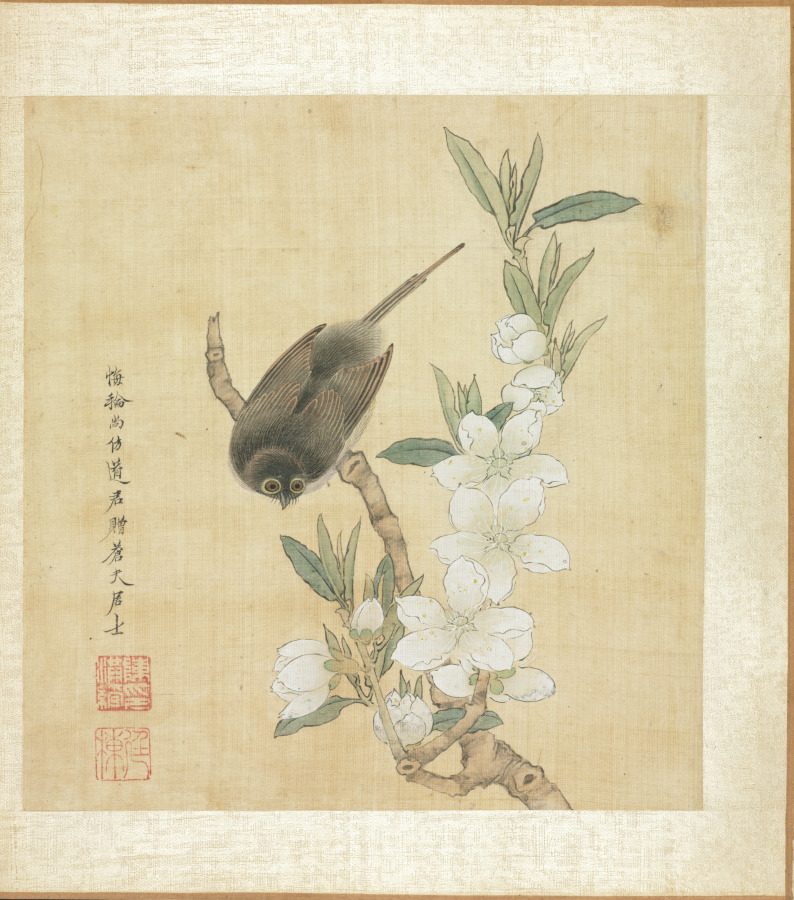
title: Paintings after Ancient Masters: A Bird and Peach-Blossom Branch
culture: China, Ming dynasty (1368–1644)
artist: Chen Hongshou (Chinese, 1598/99–1652)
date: 1598–1652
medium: album leaf, ink and color on silk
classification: Painting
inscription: Hui-lun-shang painted after Tao-chün [Emperor Hui-tsung] and presented it to Ts'ang-fu chü-chih. [Seal] Ch'en yin Hung-shou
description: The twenty paintings in this double-album by Chen Hongshou include landscapes, figures, and flowers. It also has one leaf featuring a woman, an often-used subject not found in the other albums from the latter part of his career. His late works are wonderful summations of Chen's peculiar and quirky art--archaistic, hyper-refined--but without accompanying shallowness or sentimentality. His figures and landscapes in the late albums are miniaturized, not unlike the small Chinese gardens, or the carefully selected small table rocks or old roots used for contemplation to see the world in miniature. This loss of scale is quite deliberate and reflects the psychological situation of a depressed class like the Ming loyalist officials and scholars, deprived of their integrity and honor, and forced to lead a diminished and restricted existence.